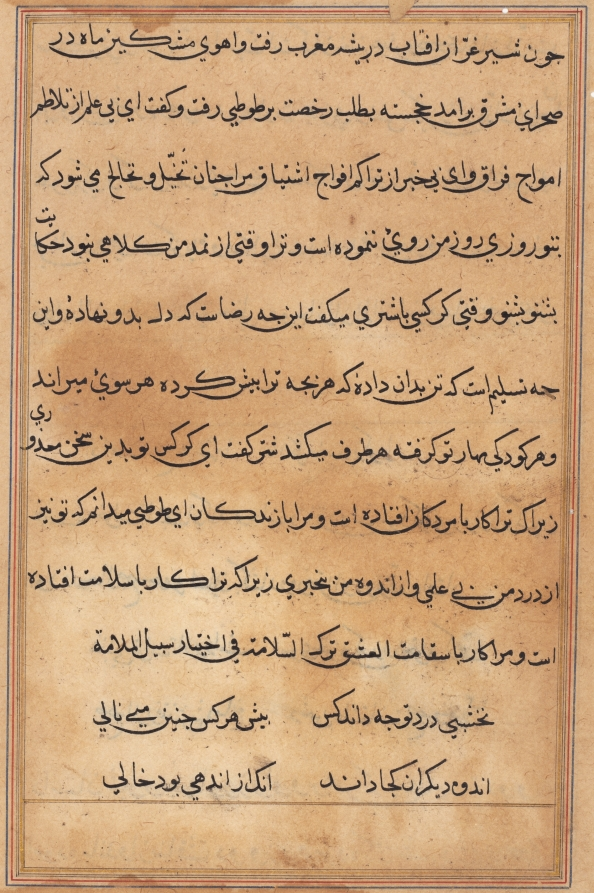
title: Page from Tales of a Parrot (Tuti-nama): text page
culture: Mughal India, court of Akbar (reigned 1556–1605)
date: c. 1560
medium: gum tempera, ink, and gold on paper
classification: Painting